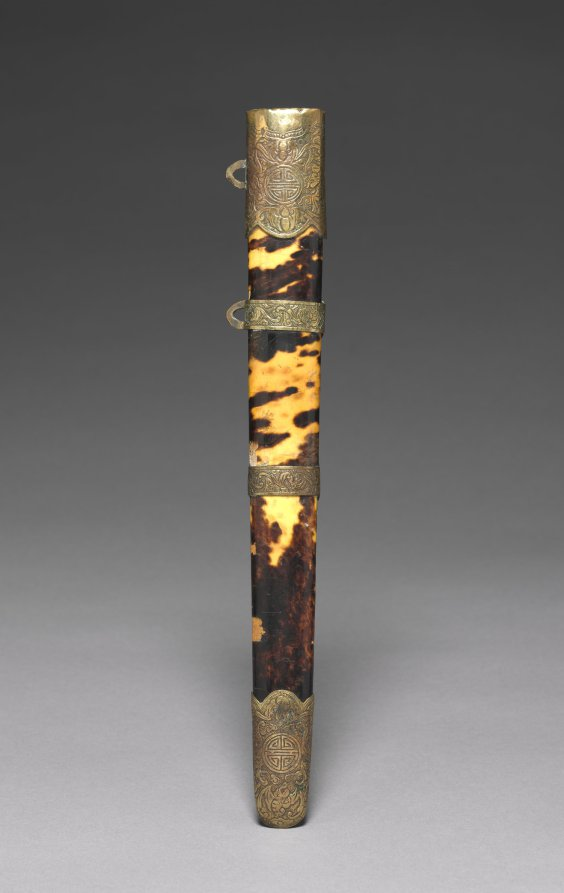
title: Scabbard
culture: Korea, Joseon dynasty (1392–1910)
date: 1800s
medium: metal and tortoiseshell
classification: Arms and Armor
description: The tortoise shell was a popular material for sword decoration for its association with the legend of ancient heroes. For example, a tortoise is believed to have helped rulers tame natural disasters.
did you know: The tortoise shell was a popular material for sword decoration for its association with the legend of ancient heroes.